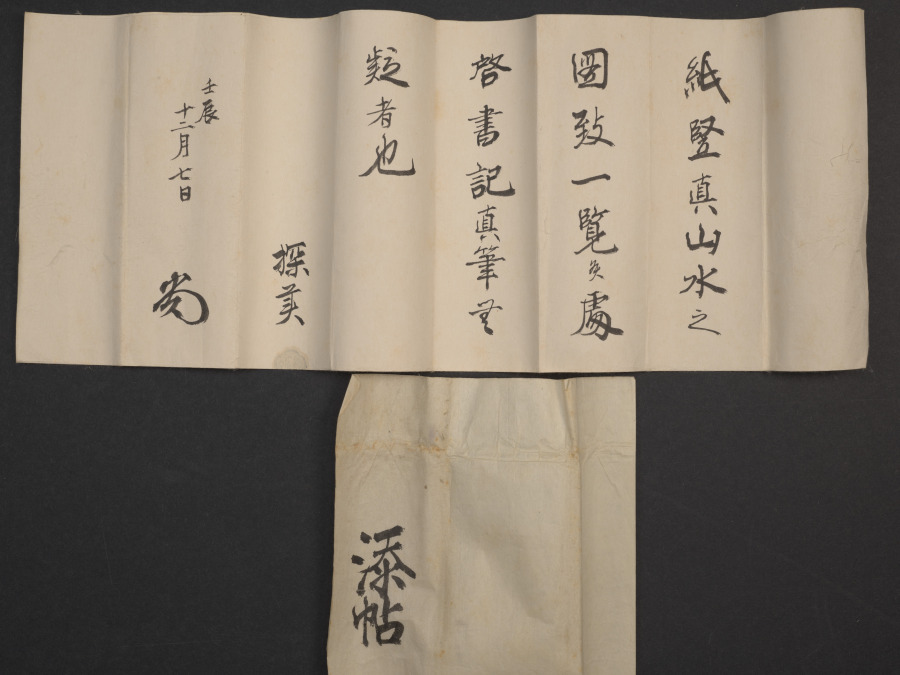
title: Coastal Landscape in the Haboku Style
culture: Japan, Muromachi period (1392–1573)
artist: Keison (Japanese, active late 15th to early 16th century)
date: late 1400s–early 1500s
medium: hanging scroll, ink on paper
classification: Painting